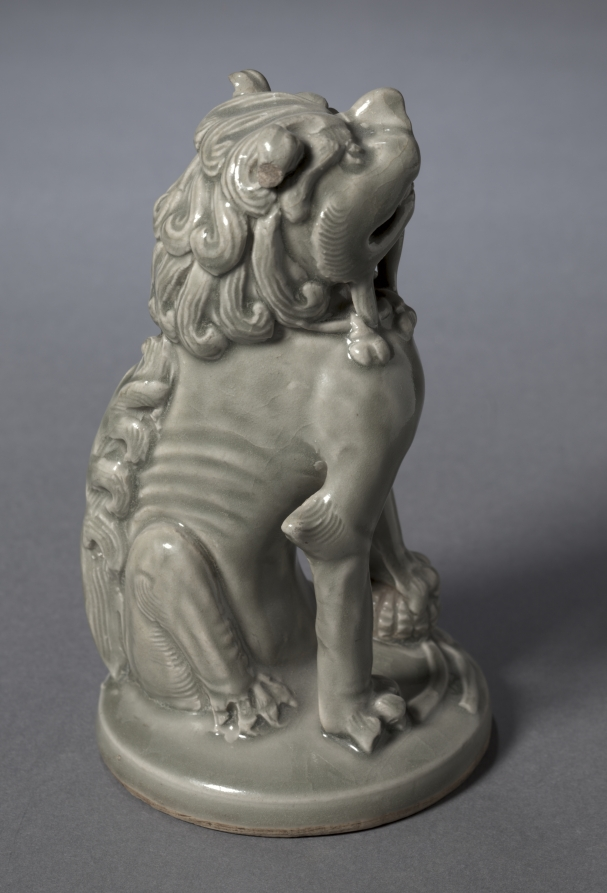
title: Incense Burner Top in the Shape of a Lion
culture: China, Shaanxi province, Northern Song dynasty (960-1127)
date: 1100s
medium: green-glazed porcelaneous stoneware, Yaozhou ware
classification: Ceramic